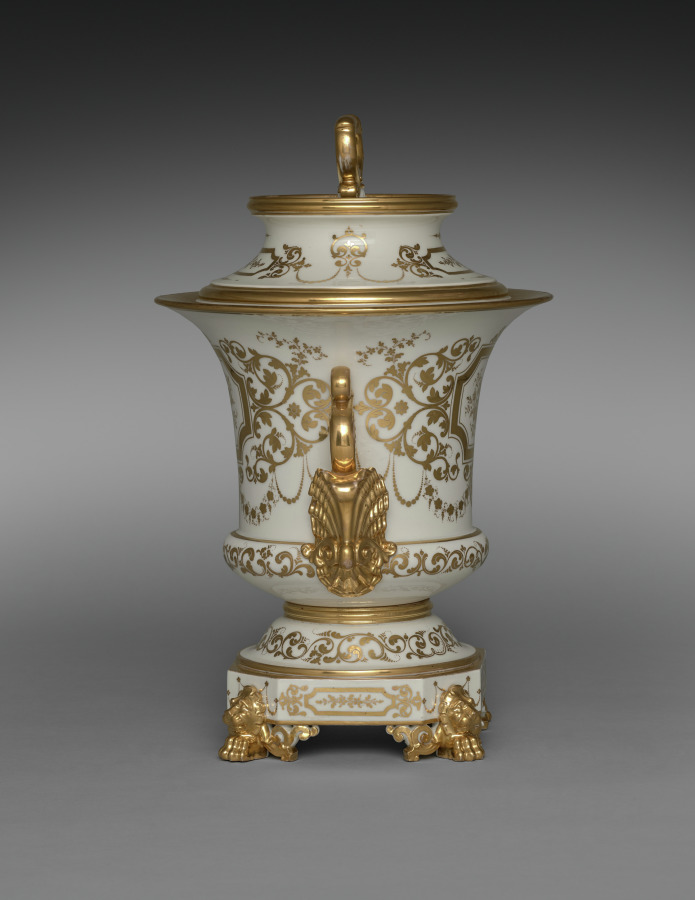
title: Covered Ice Cream Pail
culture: France, Paris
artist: Factory of Jacob-Petit (French, 1830–1865)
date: c. 1840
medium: gilt porcelain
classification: Ceramic